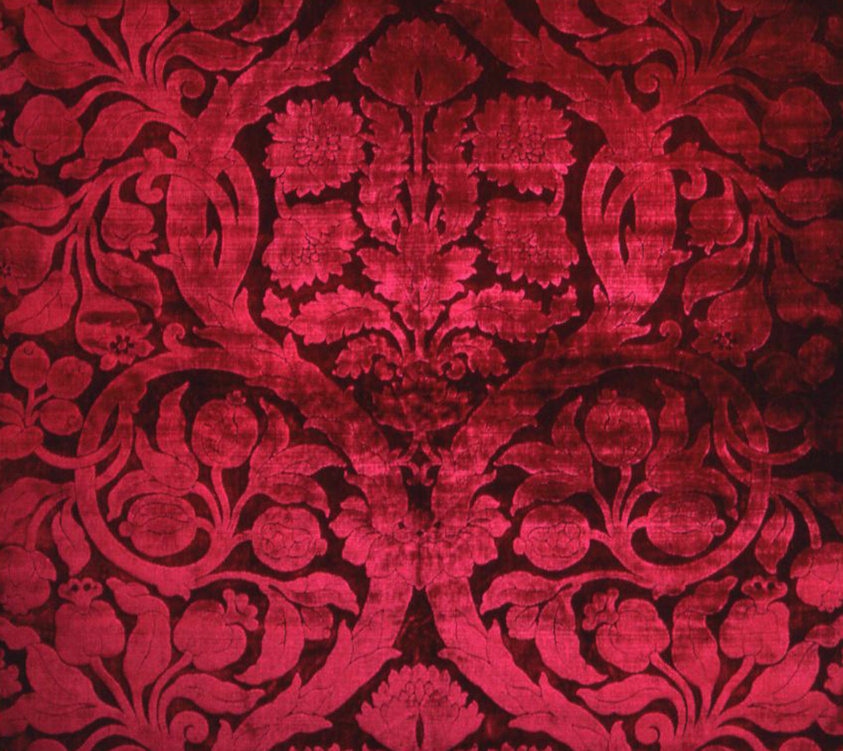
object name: Textile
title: Panel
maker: Italy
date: 1875/1900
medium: Silk, cut, pile-on-pile velvet against plain weave foundation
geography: Italy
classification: textile; weaving - velvet